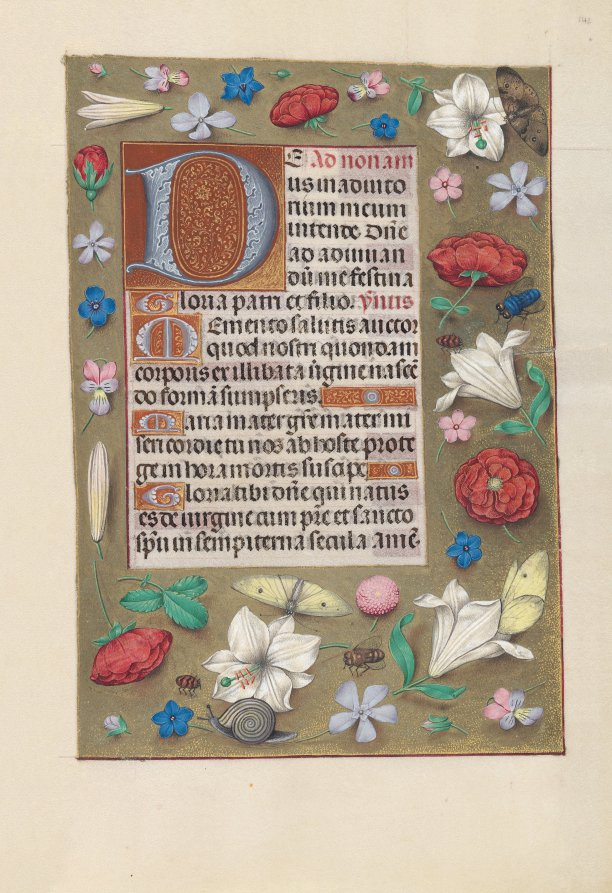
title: Hours of Queen Isabella the Catholic, Queen of Spain: Fol. 142r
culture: Flanders, Ghent and Bruges, late 15th century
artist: Master of the First Prayerbook of Maximillian (Flemish, c. 1444–1519)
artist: and Associates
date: c. 1500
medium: ink, tempera, and gold on vellum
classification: Bound Volume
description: This manuscript was illuminated by a circle of at least five highly organized manuscript painters active in the Flemish cities of Ghent and Bruges. The principal illuminator was Alexander Bening, who painted the majority of the book's miniatures. Manuscripts produced by this circle of artists are renowned for the decoration of their borders, which typically feature a rich variety of realistically-painted flowers, birds, and butterflies. This prayer book, called a book of hours, was intended not for a cleric, but for the private devotions of a lay person-in this case, Isabella the Catholic, Queen of Spain (1451-1504). Isabella's coat of arms embellishes the book's frontispiece. It is unlikely that the book was commissioned by the Queen herself; rather, she probably received it as a diplomatic gift from someone courting her patronage, perhaps Cardinal Francisco Jimenez de Cisneros. A Franciscan friar, Jimenez was dependent upon Isabella for his advancement, first to the post of Queen's confessor in 1492, and then to Archbishop of Toledo in 1495.